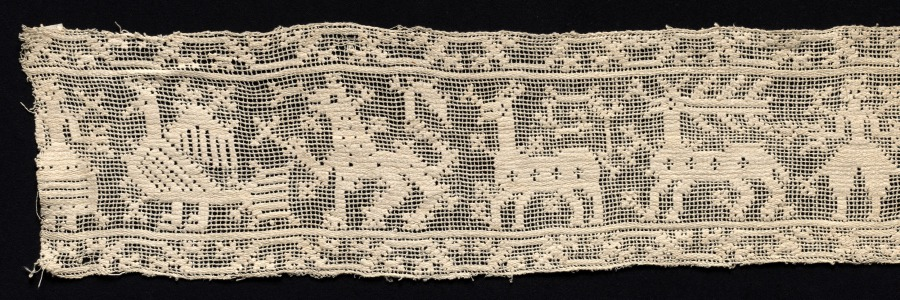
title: Band with Parade of Human Figures, Stags, and Other Fantastic Animals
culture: Italy, Sicily ?, 1500s-1600s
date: 1500s-1600s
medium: Bleached linen (est.): needle lace, burato (twined ground and darned in one direction)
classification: Lace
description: Animals viewed in profile, some with their legs raised, indicate movement, such as a parade or procession. However, the human figures are shown frontally. Linear elements protruding from their backs and hands held out and open suggest the figures may be angels modeling a gesture of prayer.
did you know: Myrta Leonora Jones, the donor of this lace, was a women’s rights activist in Cleveland in the early 1900s.